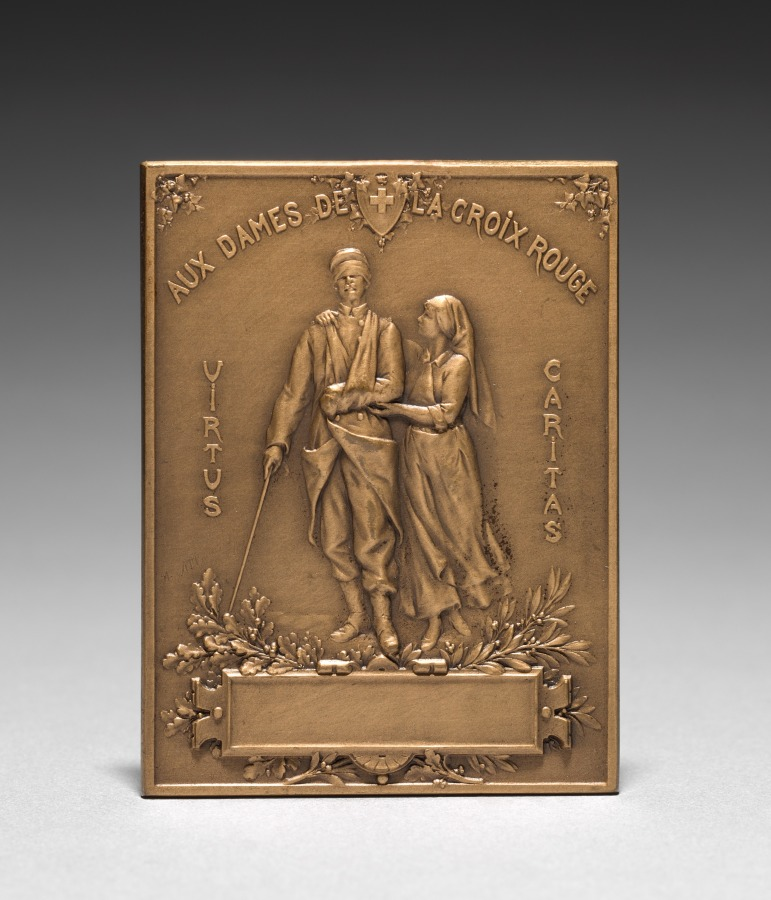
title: Medallion (reverse)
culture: France, 19th-20th century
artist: Henri Emile Allouard (French, 1844–1929)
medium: bronze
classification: Metalwork